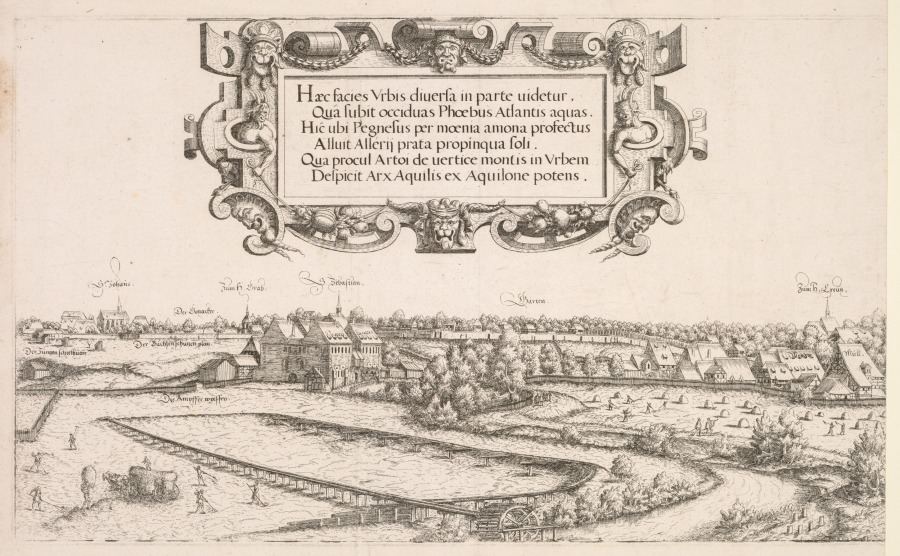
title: Panoramic View of Nuremberg: Left Portion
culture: Germany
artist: Hanns Lautensack (German, 1524–1566)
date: 1552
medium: etching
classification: Print